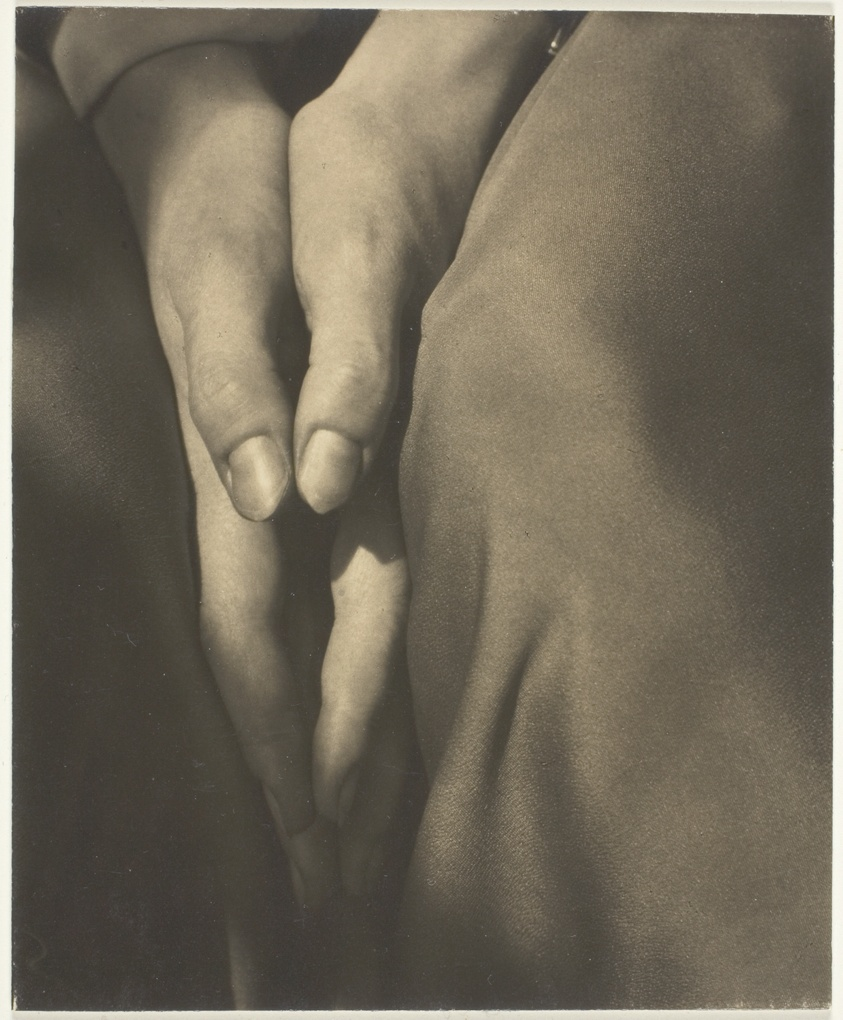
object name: Photograph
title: Dorothy Norman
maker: Alfred Stieglitz (American, 1864–1946)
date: 1930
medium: Gelatin silver print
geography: United States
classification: gelatin silver (developing-out-paper) pr; photographic process; photography; photograph